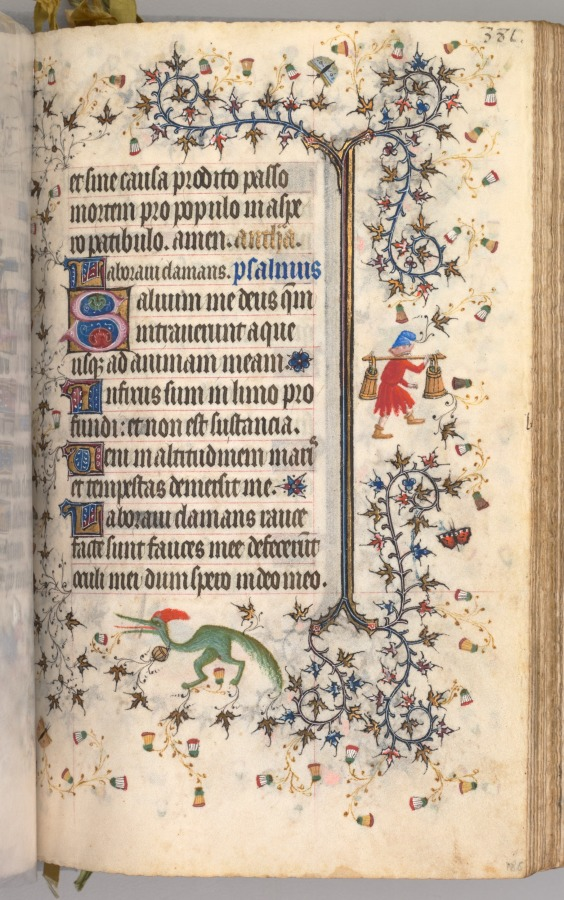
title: Hours of Charles the Noble, King of Navarre (1361-1425): fol. 186r, Text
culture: France, Paris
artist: Master of the Brussels Initials and Associates (French)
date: c. 1405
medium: ink, tempera, and gold on vellum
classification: Bound Volume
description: This precious volume was obviously highly prized by its owner, the French-born King of Navarre, who had his coat of arms painted on no less than twenty folios. Rather than directly commissioning this manuscript from a specific workshop, it seems that Charles the Noble acquired his book of hours -- perhaps ready-made for the luxury market -- while on a trip to Paris in 1404-05. A collaborative effort, six painting styles are evidenced within the pages of this codex, those of two Italians, two Frenchmen, and two Netherlanders. The painter who was responsible for the planning and decoration of the book, and who produced seventeen of the large miniatures, was a Bolognese artist known as the Master of the Brussels Initials. His principal assistant, responsible for most of the borders, was a Florentine who signed his name "Zecho" da Firenze on folio 208 verso.